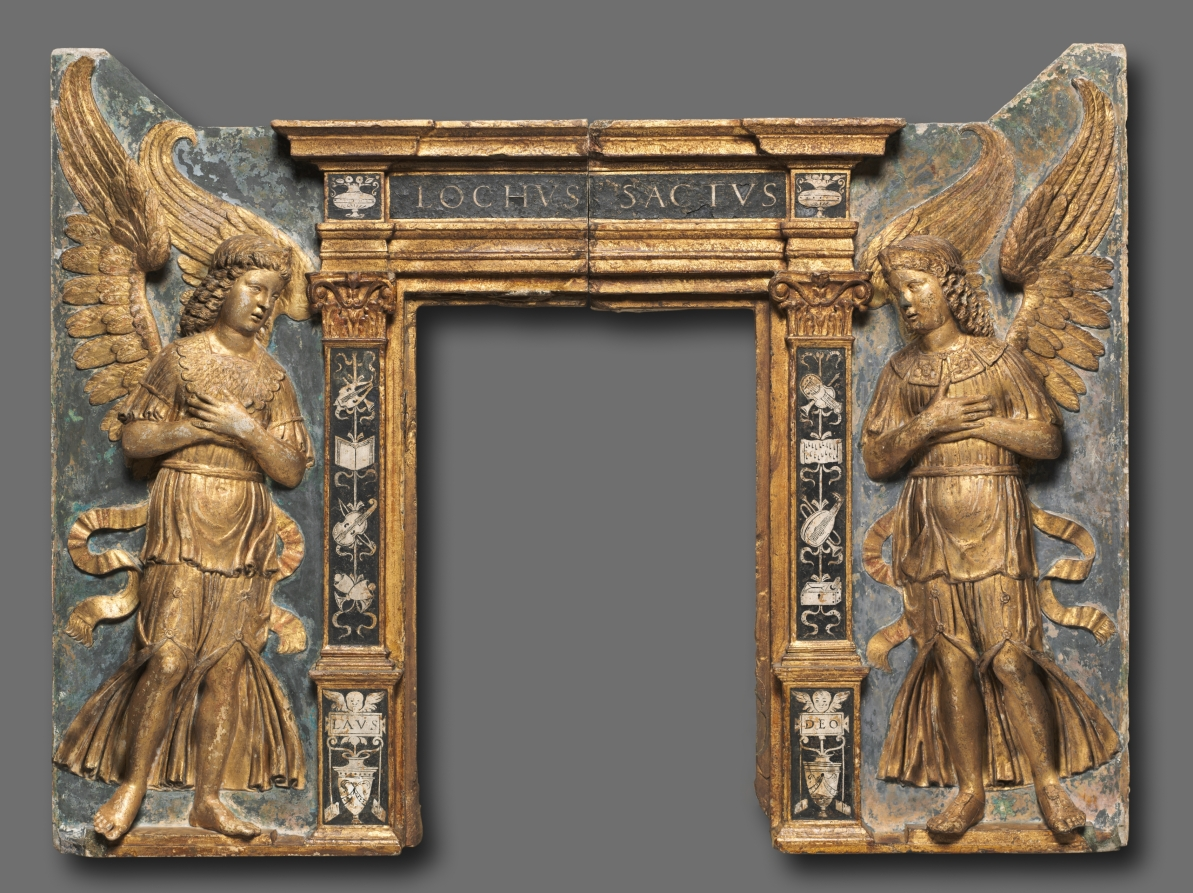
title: Tabernacle Relief with Flanking Angels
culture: Italy, Venice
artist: circle of Tullio Lombardo (Italian, c. 1455–1532)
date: c. 1480–1500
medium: polychromed marble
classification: Sculpture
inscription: pilasters painted with muscial instruments, scores, urns, and inscription: LAVS DEO; inscription on entablature: LOCHVS SACTVS.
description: This relief once framed a tabernacle—a receptacle above and behind an altar for the safekeeping of the Eucharist. The inscription over the doorway, LOCHVS SANCTVS (Holy Place), and below, LAVS DEO (Praise God), confirm the relief’s intended purpose. Originally, a door at center, perhaps in gilt bronze, would have secured the tabernacle. The pose, costumes, and modeling of the flanking angels all suggest the hand of a gifted artist probably working under the influence of Tullio Lombardo, a brilliant Venetian marble sculptor.